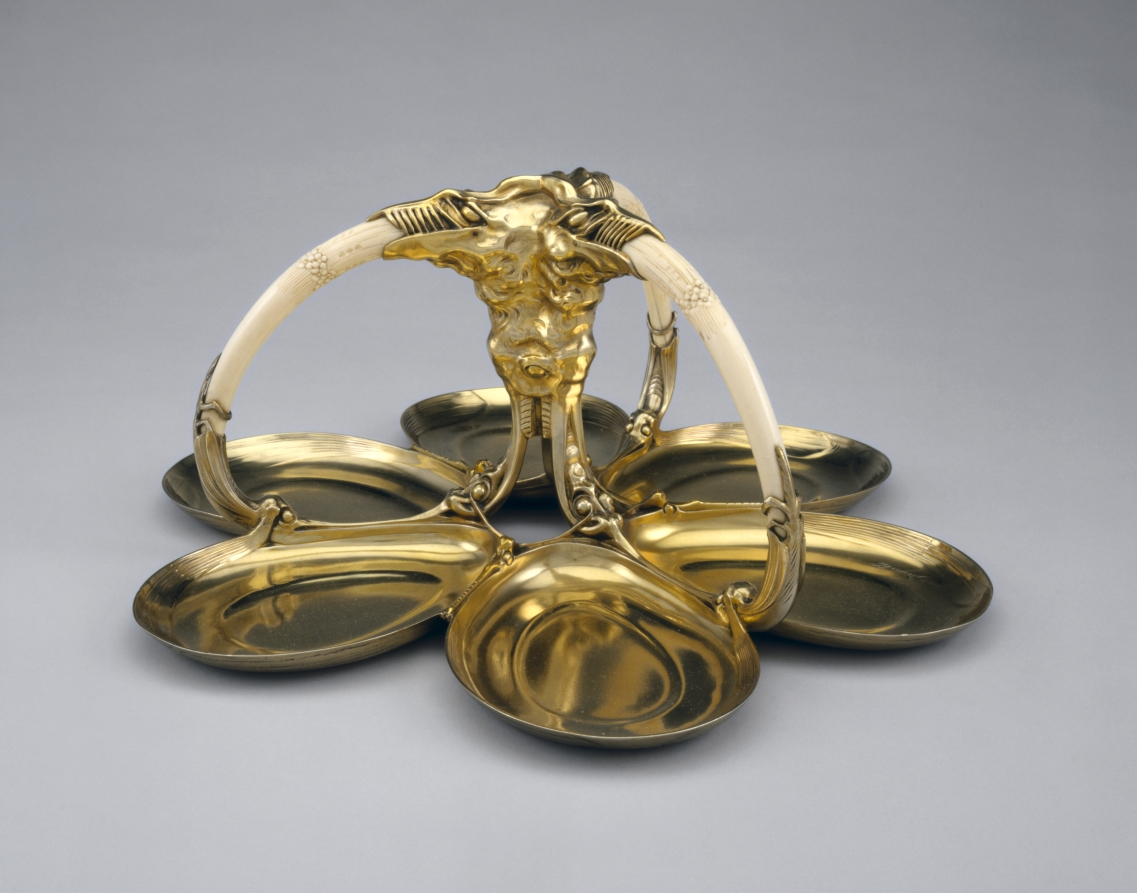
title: Salver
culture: France, Paris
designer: Carlo Bugatti (Italian, 1856–1940)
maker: Adrien-Aurélien Hebrard (French, 1866–1937)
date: c. 1907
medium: Gilt silver and ivory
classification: Silver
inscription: inscribed inside one of six ovoid compartments: "Bugatti" in ligature. Engraved on back: A.A. HEBRAND/ 8 RUE ROYAL/PARIS FRANCE.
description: This tea and coffee service, salver, and table, together with some now missing cups, were all designed by Carlo Bugatti as an ensemble and presented at the 1902 exposition devoted to decorative arts in Turin, Italy. The set was probably acquired from Bugatti's 1907 exhibition at the Galerie Hébrard in Paris by a wealthy South African widow, Anna Blake, who was living there at the time. Some of the animal and insect motifs suggest mythical beasts or the fossils of prehistoric animals. When Mrs. Blake returned to Cape Town, she took these and other pieces designed by Bugatti with her, and they remained in South Africa throughout her lifetime.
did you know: Carlo Bugatti's sons achieved illustrious careers of their own. Rembrandt Bugatti (1884-1916) became a celebrated sculptor, and Ettore Bugatti (1881-1947) manufactured luxurious automobiles and racing cars.